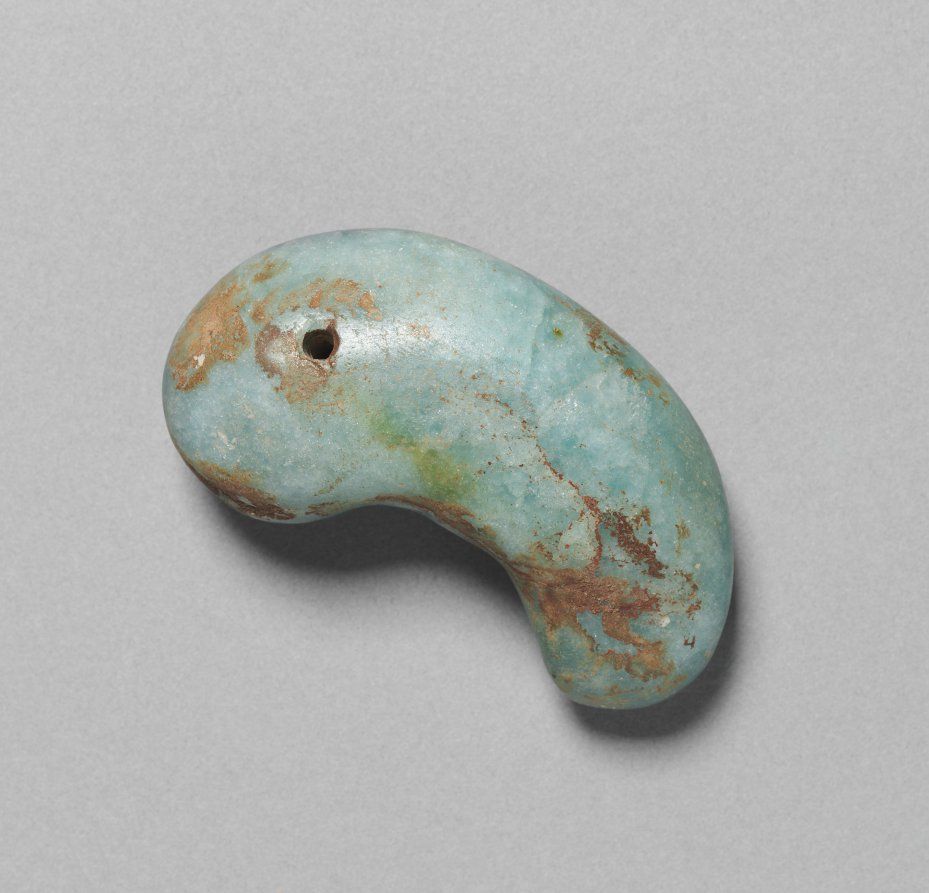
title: Comma-shaped Jade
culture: Korea, Three Kingdoms period (57 BCE–668 CE)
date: 400s CE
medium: glass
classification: Jewelry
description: Jade is one of the hardest stones and requires an intensive, arduous process of abrasion—cutting, chiseling, grinding, and polishing—to achieve the desired shape. A grindstone and a slurry of grit and water shape the jade into the desired form, and then a cloth dampened and rubbed with finer grit may have been used to give the jade the smooth surface. For the Silla kingdom (57 BC–985), in particular, comma-shaped jades served as an essential item for the burials of the ruling class and were luxurious accessories to decorate golden crowns. Their comma shape is thought to represent embryonic forms, symbolizing life, particularly rebirth in the afterlife.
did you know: This unique shaped jade was used as a pendant to decorate necklaces, earrings, and crowns during the Three Kingdoms period.